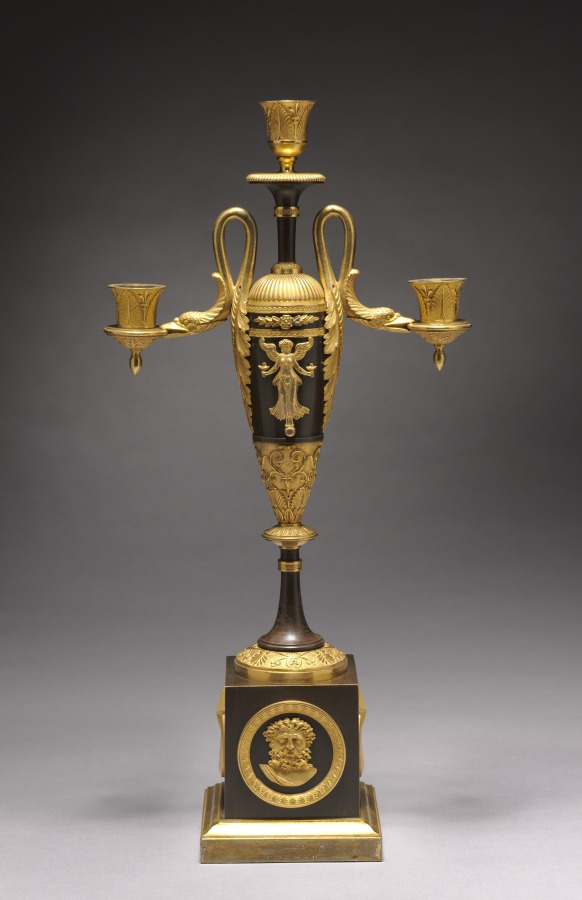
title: Candelabrums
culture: France, late 18th-early 19th century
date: c. 1800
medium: gilt and patinated metal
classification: Furniture and woodwork